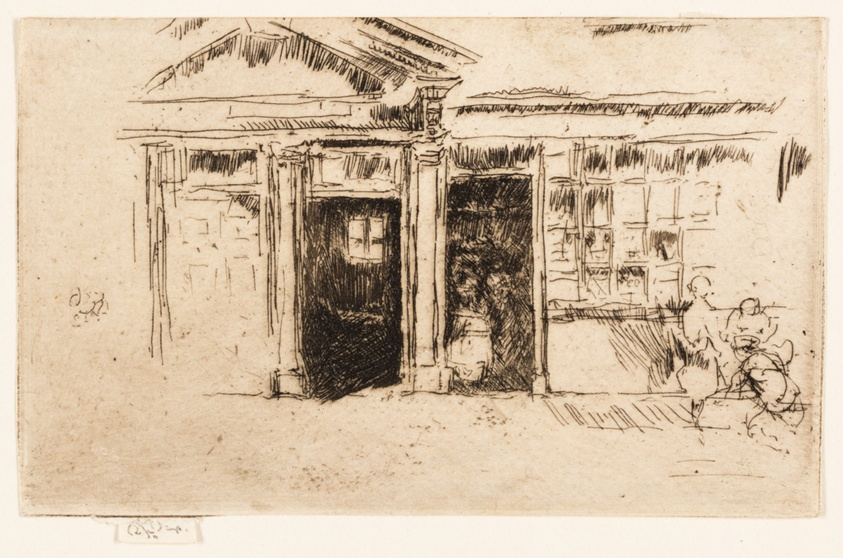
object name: Print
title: Double Doorway, Sandwich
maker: James McNeill Whistler (American, 1834-1903)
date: 1887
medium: Etching and drypoint with foul biting in black ink on cream laid paper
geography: United States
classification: etching; foul biting; print; prints and drawing; paper; drypoint